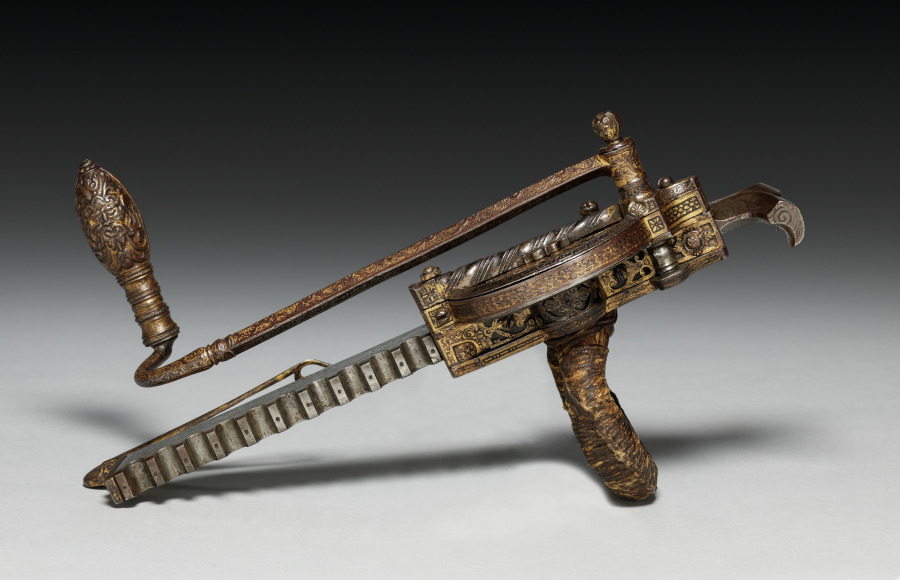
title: Cranequin with Arms of Elector Augustus I of Saxony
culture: Germany, Saxony, 16th century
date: c. 1553–73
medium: steel; etched, chased and gilded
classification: Arms and Armor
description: This winder or cranequin was for Prince Elector Augustus I, a member of the ruling elite in the Holy Roman Empire. Augustus, powerful and wealthy, had even the most practical instruments ornately decorated, including this cranequin.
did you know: Augustus was a marksman who took part in crossbow competitions. He had a large collection and often gave them to friends.